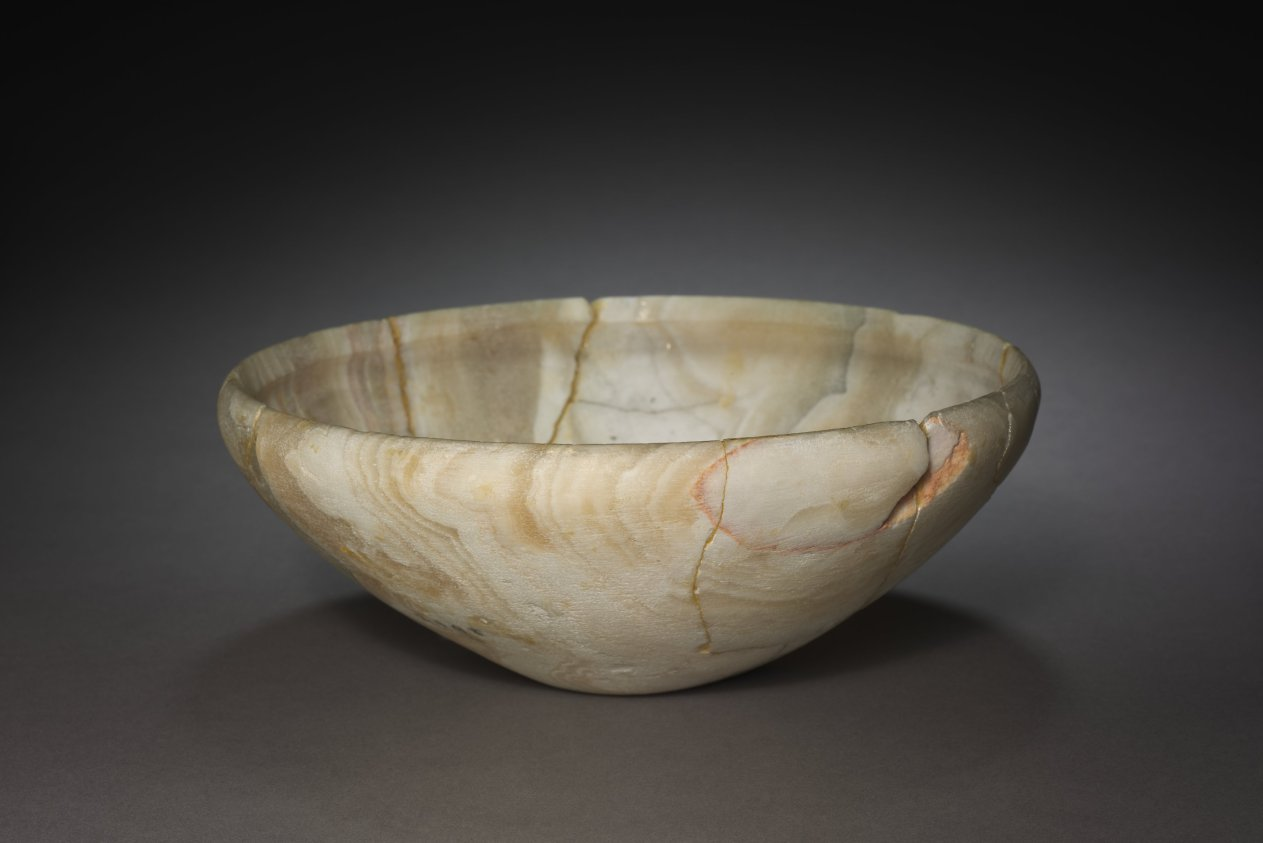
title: Bowl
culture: Egypt, Early Dynastic (2950–2647 BCE), Dynasty 2, reign of Nynetjer (c. 2700 BCE) or later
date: 2770–2647 BCE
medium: travertine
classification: Vessels